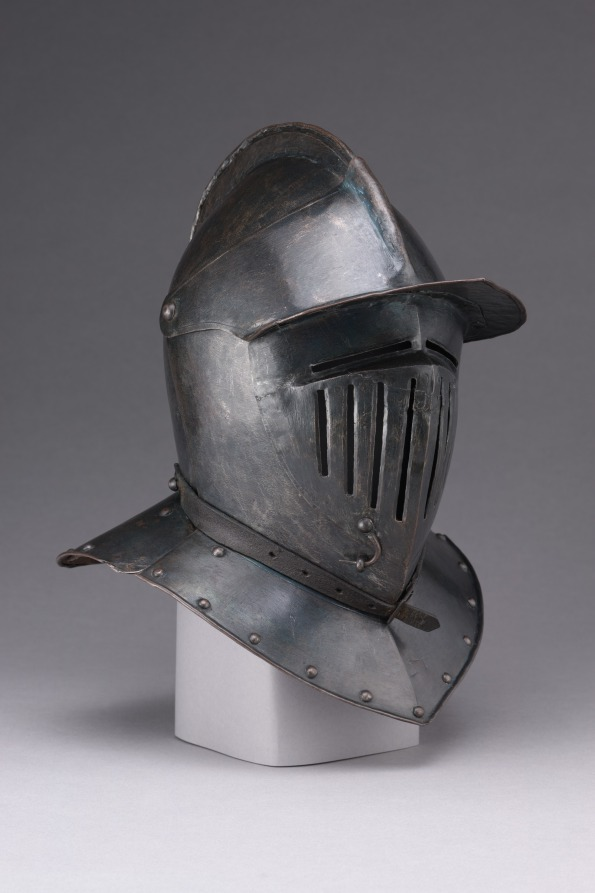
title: Cuirassier's Armor: Helmet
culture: Austria, Graz(?), early 17th century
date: c. 1600–20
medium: steel (originally blued, now black); leather straps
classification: Arms and Armor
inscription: Proof mark (musket shot) is located on the proper left side of the breastplate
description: The cuirassier was the heavy cavalryman of the late 1500s and early 1600s. Carrying pistols and a sword, he was clad in full armor, with the exception of his lower legs, which were protected by heavy riding boots. Shortly after 1650, such heavy cavalry armor disappeared from use. By then, European cavalries had abandoned full armor as impractical against the increased sophistication of firearms.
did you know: When assembled, this suit of armor is just over 5-1/2 feet tall.